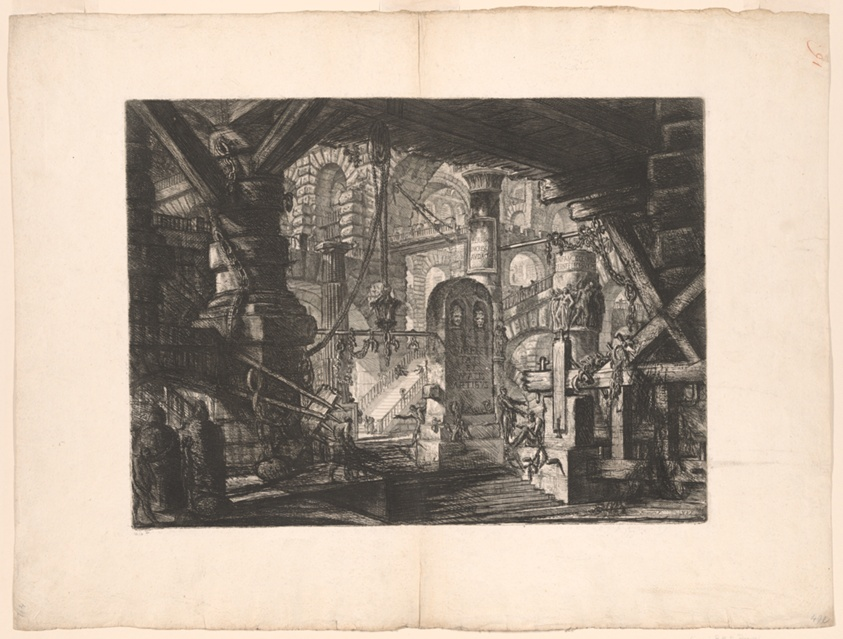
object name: Print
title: The Pier with Chains, plate 16 from Imaginary Prisons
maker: Giovanni Battista Piranesi (Italian, 1720-1778)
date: 1761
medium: Etching and engraving on heavy ivory laid paper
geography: Italy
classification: etching; print; prints and drawing